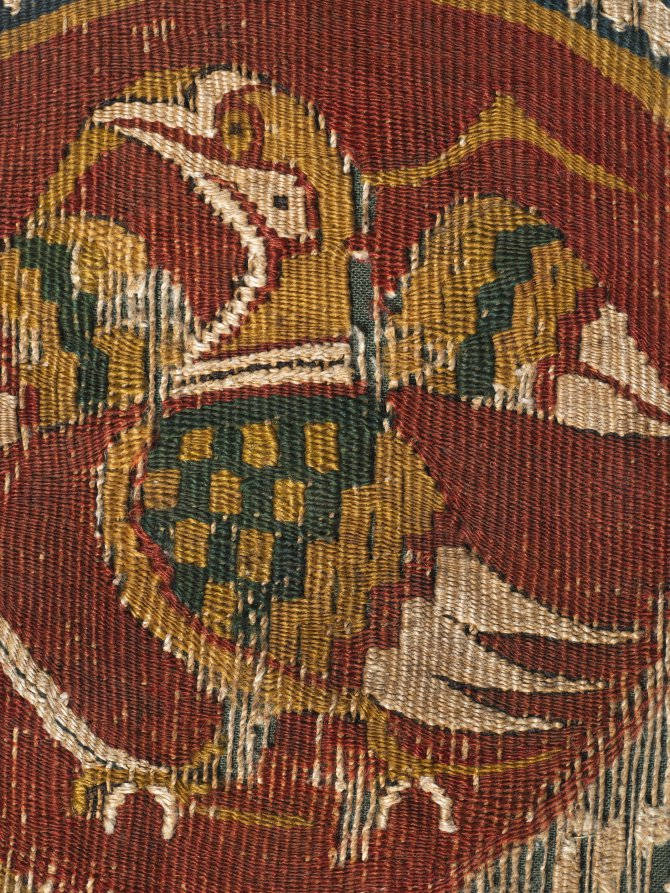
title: Pillow cover with Arabic inscription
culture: Egypt, al-Bahnasa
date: 800s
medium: Wool and linen: tapestry weave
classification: Textile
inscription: "In the name of God. Blessing from God to its owner. Of what was made in the tiraz."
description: This rare complete Egyptian pillow cover is a masterpiece of contrasting colors. Crimson and blue-green wool alternate in the ground and bird-inhabited roundels, supported by mustard-colored wool and undyed linen woven in tapestry weave. When folded down the center, based on examples from Egyptian burials, four birds form a unit on each side and are appropriately ascending in flight. Above, an Arabic text written in angular Kufic script reads, "In the name of God. Blessing from God to its owner. Of what was made in the tiraz." The word tiraz means factory or an Arabic-inscribed textile. This was probably made in al-Bahnasa, the city renowned for colorful wool textiles with figures, as they claimed, from a "gnat to the elephant."